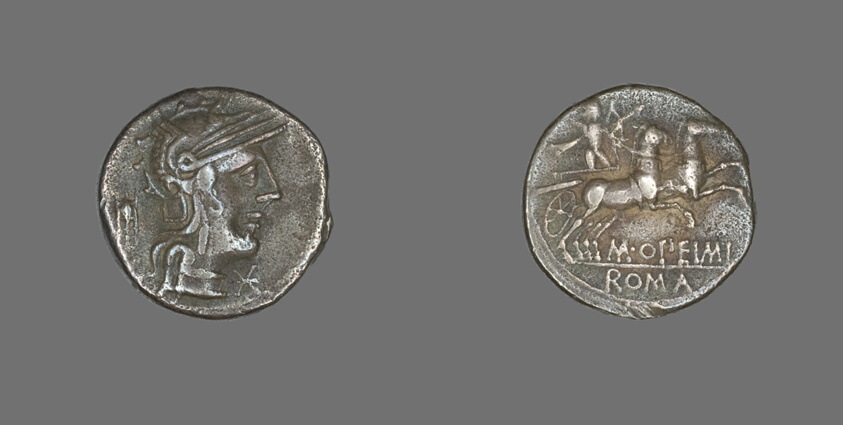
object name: Coin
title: Denarius (Coin) Depicting the Goddess Roma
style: roman (ancient, style or period), ancient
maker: Roman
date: 131 BCE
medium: Silver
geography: Roman Empire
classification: coin; ancient art